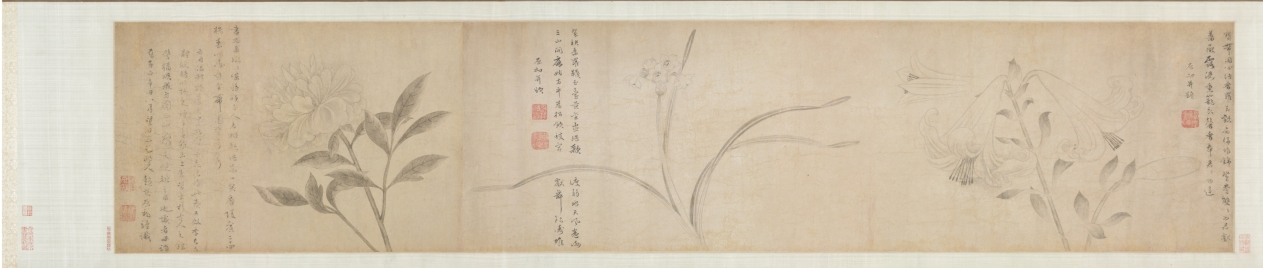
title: Ink Flowers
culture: China, Yuan dynasty (1271-1368)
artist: Zhao Zhong (Chinese, second half of the 1300s)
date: 1361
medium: Handscroll; ink on paper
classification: Painting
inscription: 寶帶同心結，香羅合歡扇。/ 繡作錦鴛鴦，雙雙為君獻。/ 薔薇露灑熏籠衣，馨香奉君君勿違。 原初并題。 [印] 趙衷原初畫記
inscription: 翠袂素羅韈，玉臺黃金盃。浩歌渡弱水。天風卷海三山開，麻姑方平為招飲，蛟宮獻舞銀濤堆。 原初并題。 [印] 雲林清趣、[印] 趙衷原初畫記。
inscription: 右用湯叔雅慶元中所寫墨花法作此卷，又效李長吉體賦詩以題之。詩與畫雖未工，要皆出於古人之餘，譬猶欲成方圓而必求其規矩之用也，識者毋誚焉！至正辛丑八月望日，東吳野人趙衷原初謹識。 [印] 趙原初、[印] 傳世清玩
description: Zhao Zhong's flowers, each paired with a poem, echo the fine-style colored flowers of the academic tradition, but instead he used only ink. Fine lines define the contours of each plant, as well as the veins within each petal and leaf. Careful ink washes give subtle modeling to the forms. The combination of lily, narcissus, and peony is unusual as the three belong to no known seasonal or symbolic system popular in the fourteenth century. Zhao’s medical training may have influenced the selection. Powdered lilies, for example, were prescribed to dispel grief, while the bark of tree peony roots was used as a treatment for various blood disorders.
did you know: This handscroll is a very rare example of ink flowers in the linear baimiao style of the fourteenth century.